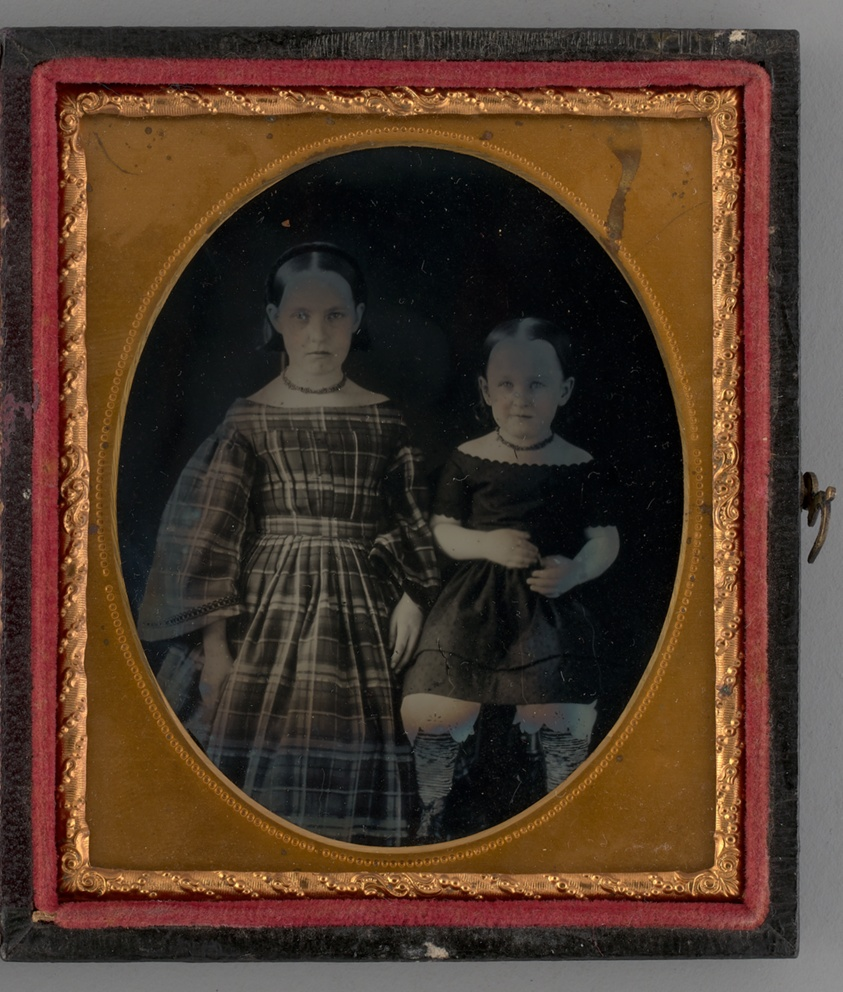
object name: Photograph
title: Untitled (Portrait of Two Girls)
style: 19th century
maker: Unknown maker; American, 19th century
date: 1865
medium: Ambrotype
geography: United States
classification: portrait; photograph; photographic process; photography; portrait; ambrotype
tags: lundberg collection, portraits, portraits: female subject, portraits: multiple subjects, portraits: child subject, sisters, girls, portrait